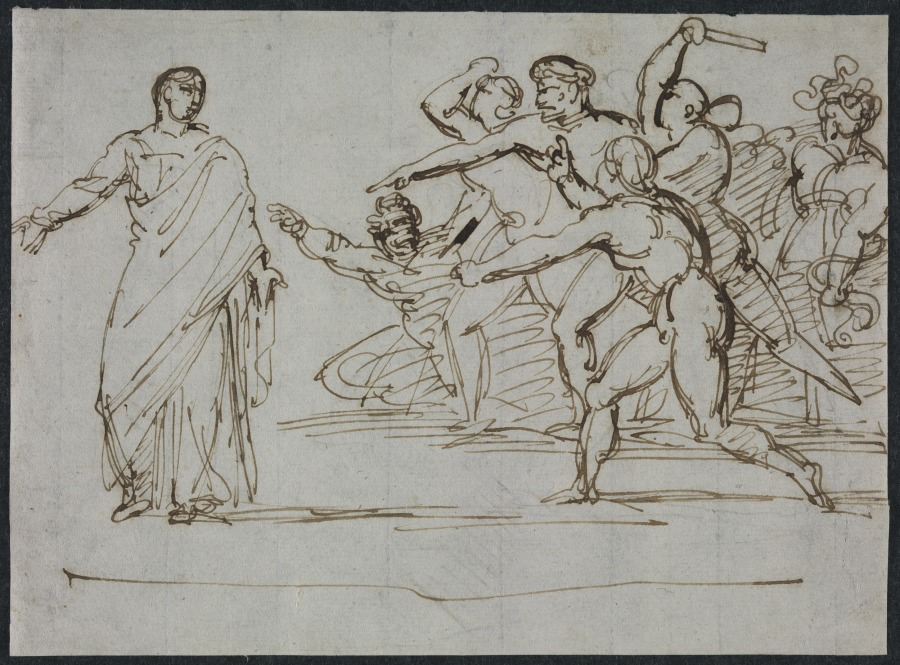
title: Assassination of Tiberius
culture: France, 19th century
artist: Théodore Géricault (French, 1791–1824)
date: 1816–1817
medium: pen and brown ink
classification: Drawing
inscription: inscribed on verso, diagonally oriented from top left to bottom right, in graphite,: [illegible]; lower right, in graphite: E; lower left, in graphite: 41/29